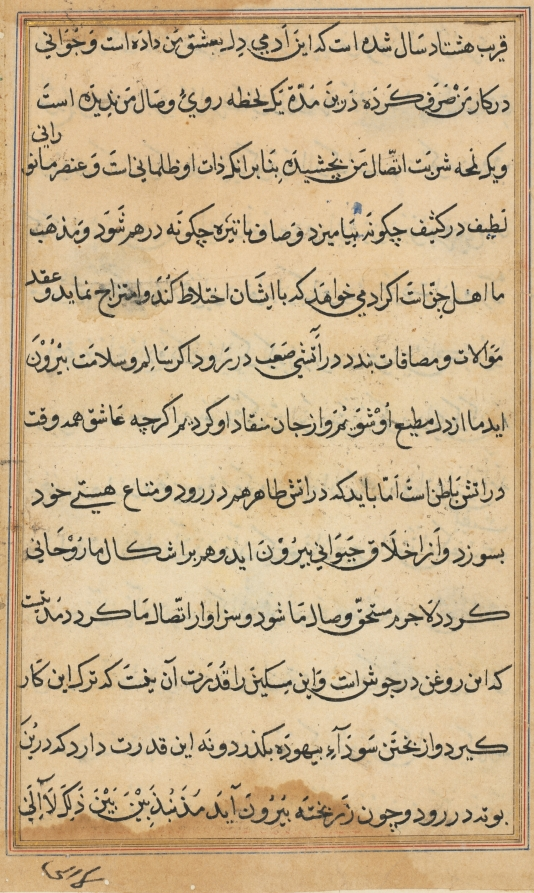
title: Page from Tales of a Parrot (Tuti-nama): text page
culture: Mughal India, court of Akbar (reigned 1556–1605)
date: c. 1560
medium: gum tempera, ink, and gold on paper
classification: Painting